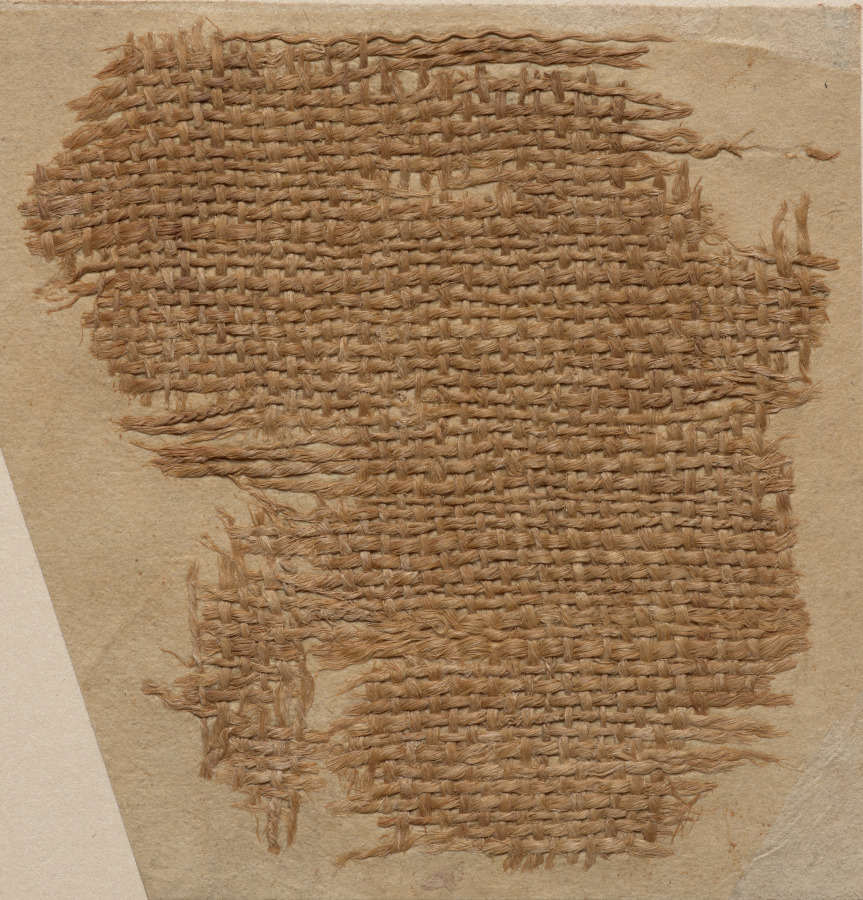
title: Fragment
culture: China or Japan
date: 700s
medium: plain cloth weave; hemp (?)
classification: Textile